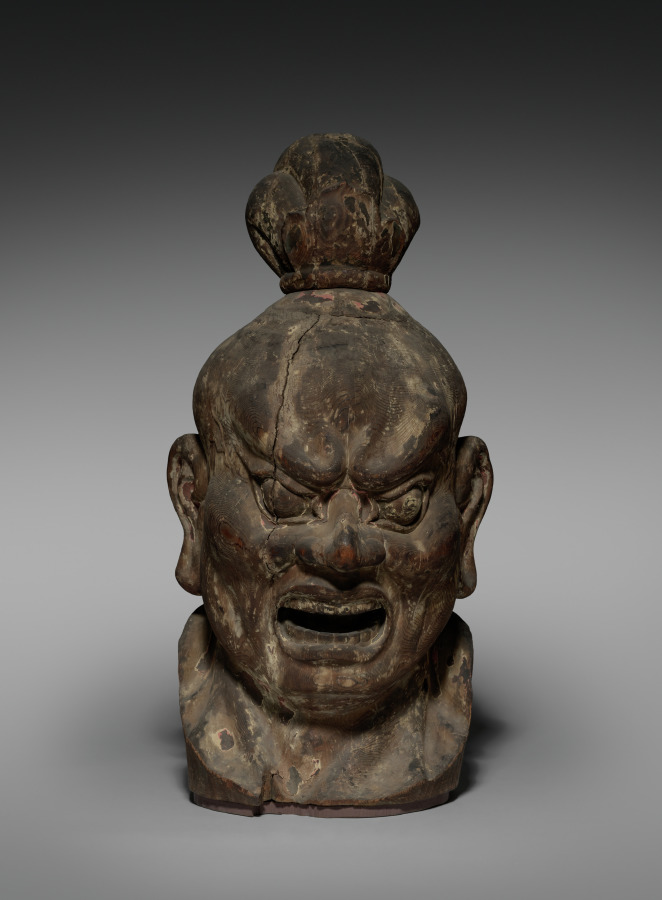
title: Head of Ni-o with Open Mouth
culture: Japan, Kamakura period (1185–1333)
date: 1200s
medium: wood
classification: Sculpture